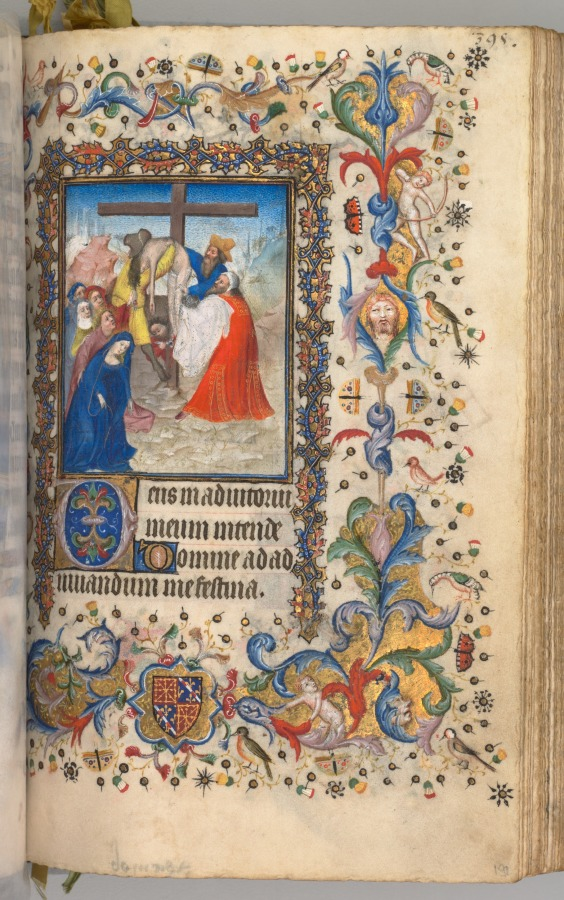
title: Hours of Charles the Noble, King of Navarre (1361-1425): fol. 192r, Descent from the Cross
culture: France, Paris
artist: Master of the Brussels Initials and Associates (French)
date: c. 1405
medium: ink, tempera, and gold on vellum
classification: Bound Volume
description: This precious volume was obviously highly prized by its owner, the French-born King of Navarre, who had his coat of arms painted on no less than twenty folios. Rather than directly commissioning this manuscript from a specific workshop, it seems that Charles the Noble acquired his book of hours -- perhaps ready-made for the luxury market -- while on a trip to Paris in 1404-05. A collaborative effort, six painting styles are evidenced within the pages of this codex, those of two Italians, two Frenchmen, and two Netherlanders. The painter who was responsible for the planning and decoration of the book, and who produced seventeen of the large miniatures, was a Bolognese artist known as the Master of the Brussels Initials. His principal assistant, responsible for most of the borders, was a Florentine who signed his name "Zecho" da Firenze on folio 208 verso.